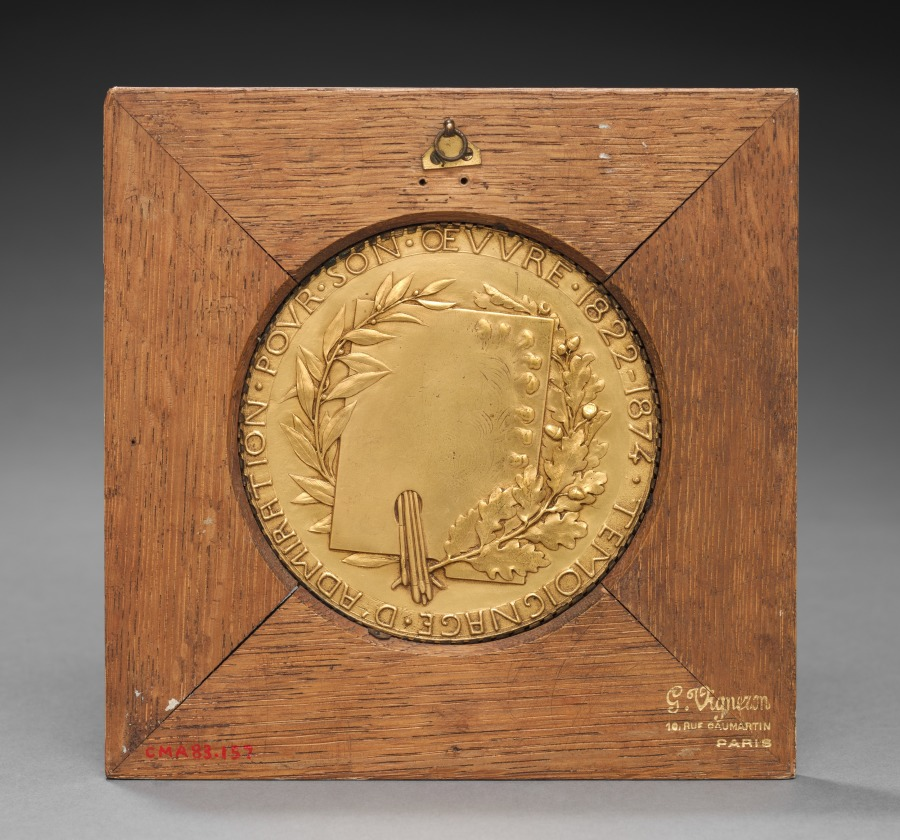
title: Medal of Corot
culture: France, 19th century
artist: Adolphe-Victor Geoffroy-Dechaume (French, 1816–1892)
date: 1874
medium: gilt bronze, wood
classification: Sculpture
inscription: Signed on cut of neck in ligature: "Geoffroy Dechaume". Obverse inscribed: "A.COROT.SES.CONFRERES.ET.SES.ADMIRATEURS.IVIN.1874". Reverse inscribed: "TEMOIGNAGE.D'ADMIRATION.POUR.SON.OEUVRE.1822-1874.